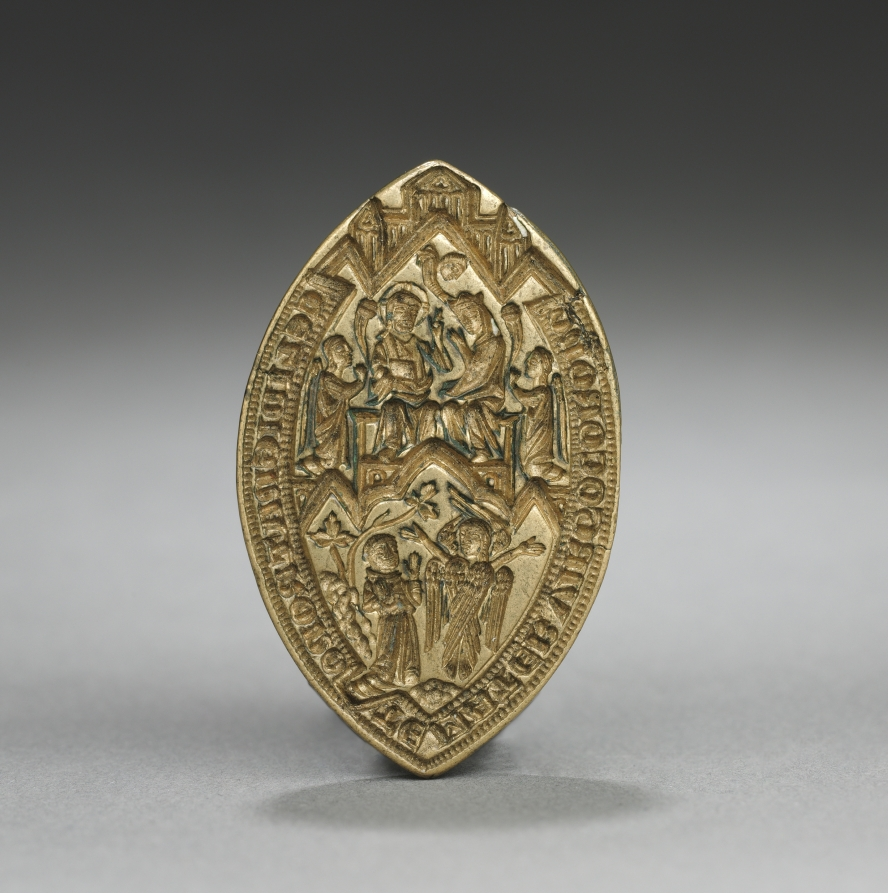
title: Almond-Shaped Seal: Coronation of the Virgin with a Kneeling Monk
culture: England or Germany, Gothic period, 14th century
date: 1300s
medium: gilded bronze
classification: Glyptic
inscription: CELI DIGNA TRONO TE MATER VIRGO CORONA.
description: These seals were once used in monasteries as molds for making wax impressions that were routinely pressed onto letters, charters, and other documents as proof of authenticity.